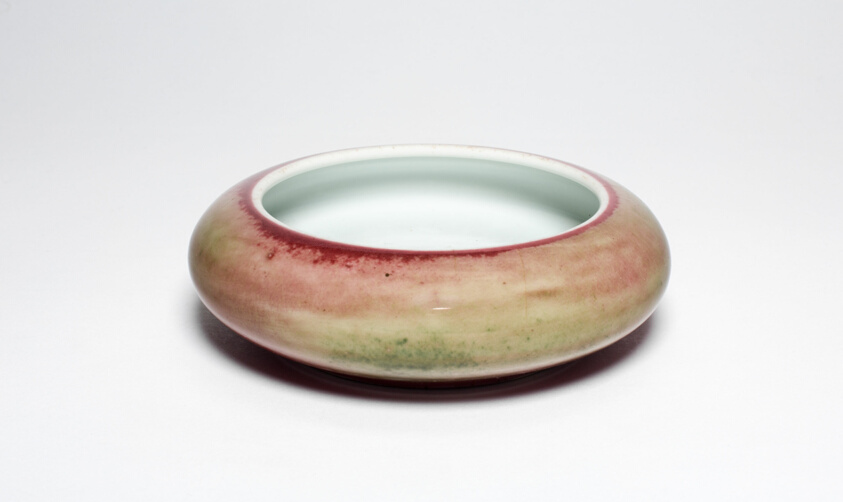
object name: Vessel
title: Brush Washer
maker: China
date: Qing dynasty (1644–1911), Kangxi reign mark and period (1662–1722)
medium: Porcelain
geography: China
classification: porcelain; asian art; ceramics